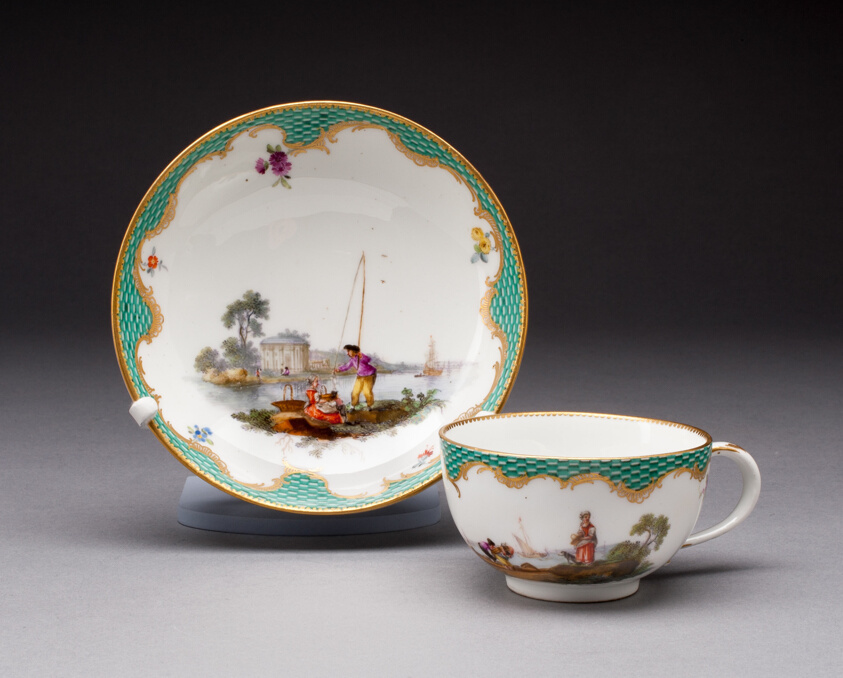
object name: Ceramics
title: Cup and Saucer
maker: Meissen Porcelain Manufactory (German, founded 1710)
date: 1763/74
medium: Hard-paste porcelain, polychrome enamels, and gilding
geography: Meissen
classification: drinking vessel; teaware; porcelain; european decorative arts; ceramics